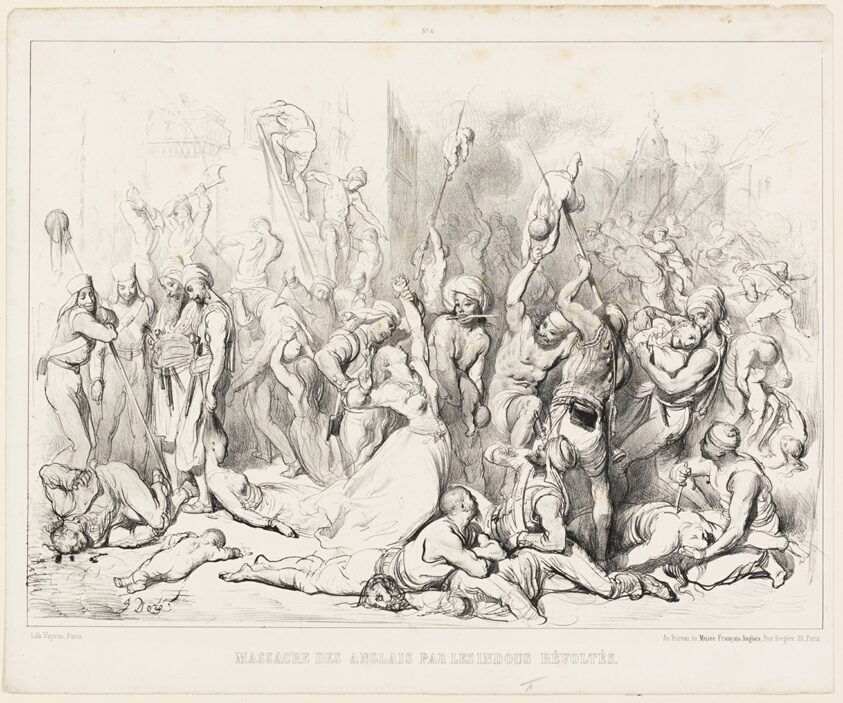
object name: Print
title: Massacre of the English by Revolting Hindus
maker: Gustave Doré (French, 1832-1883)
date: 1857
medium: Lithograph in black on white wove paper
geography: France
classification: lithograph; print; prints and drawing